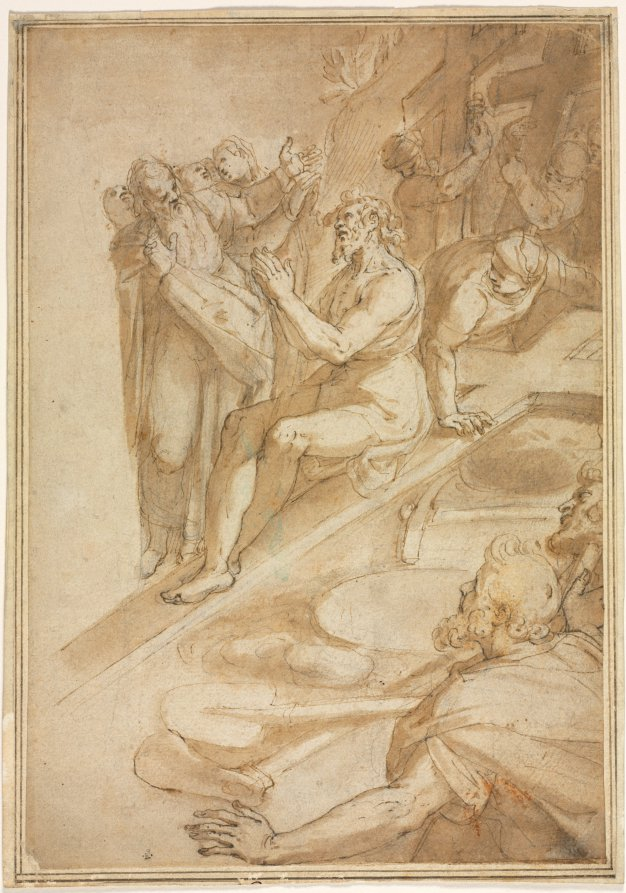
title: The Verification of the True Cross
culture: Italy, late 16th century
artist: Filippo Bellini (Italian, c. 1550–1603)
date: c. 1590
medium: pen and brown ink, brown wash, over graphite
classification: Drawing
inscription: black ink stamp, P over E: Edmund Prideaux (d. 1745), Lugt, 893, lower left: on verso in brown ink: Joseph Porta dit Saleriati(?); a partially erased graphite inscription below (not legible).